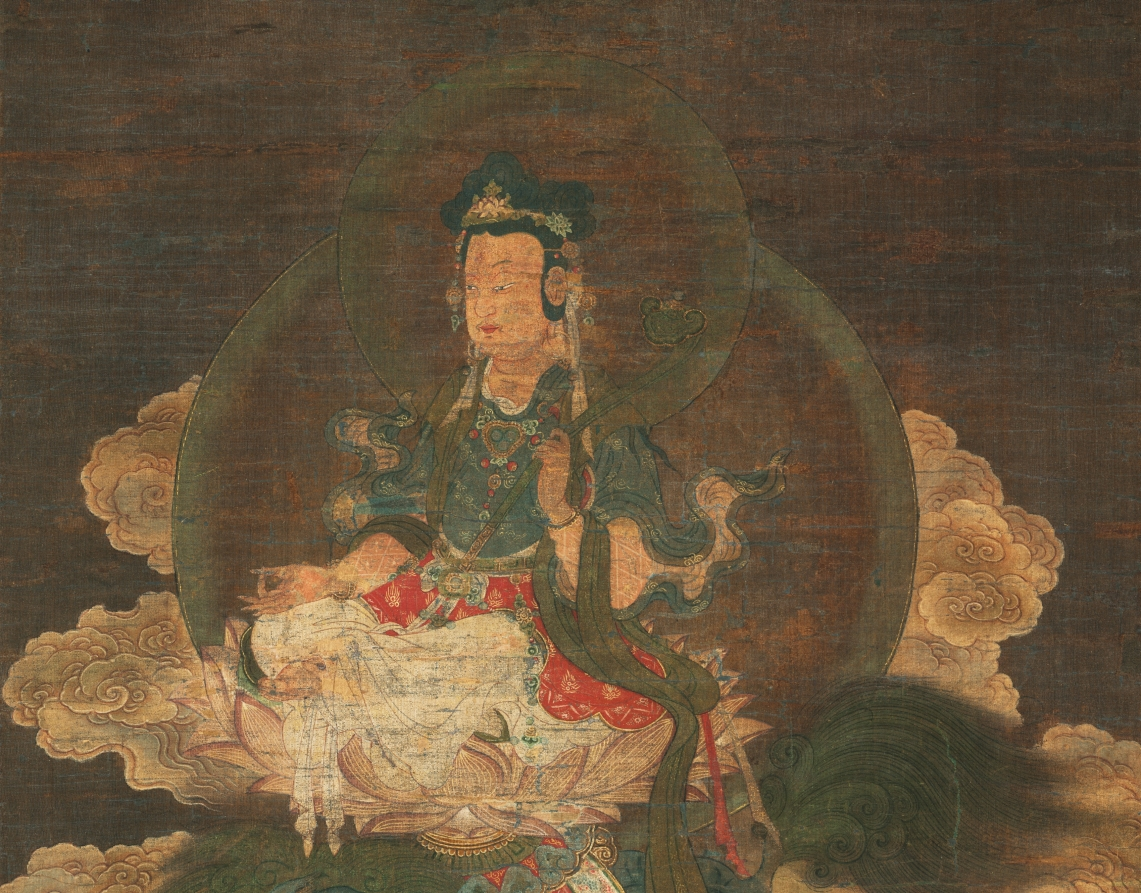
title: Shakyamuni Triad: Buddha Attended by Manjushri and Samantabhadra (Bodhisattva with Lion)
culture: China, Fuzhou, Fujian Province, Yuan dynasty (1271-1368)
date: late 1300s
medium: Hanging scroll; ink and color on silk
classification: Painting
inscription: Inscription at the bottom of the central scroll reads: "Da Song Fuzhou fu…(Fuzhou prefecture of the great Song)."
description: This triptych is a rare example of Yuan Buddhist painting. It depicts the historic Buddha Shakyamuni flanked by two attending bodhisattvas, Manjushri (the bodhisattva of wisdom, riding a lion) and Samantabhadra (the bodhisattva of universal virtue, riding an elephant). Below them are others seeking enlightenment: two disciples of the Buddha (Ananada and Kasyapa), two non-Chinese people, a boy with topknots, and a female worshiper. The clouds above and around the divine beings form one scene that illustrates Shakyamuni’s sermon from the Lotus Sutra. This text became an important basis for Buddhist faith throughout East Asia and was central to the Mahayana school of Buddhism.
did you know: Manjushri, the bodhisattva of wisdom, leads the child Sudhana on his quest for enlightenment.